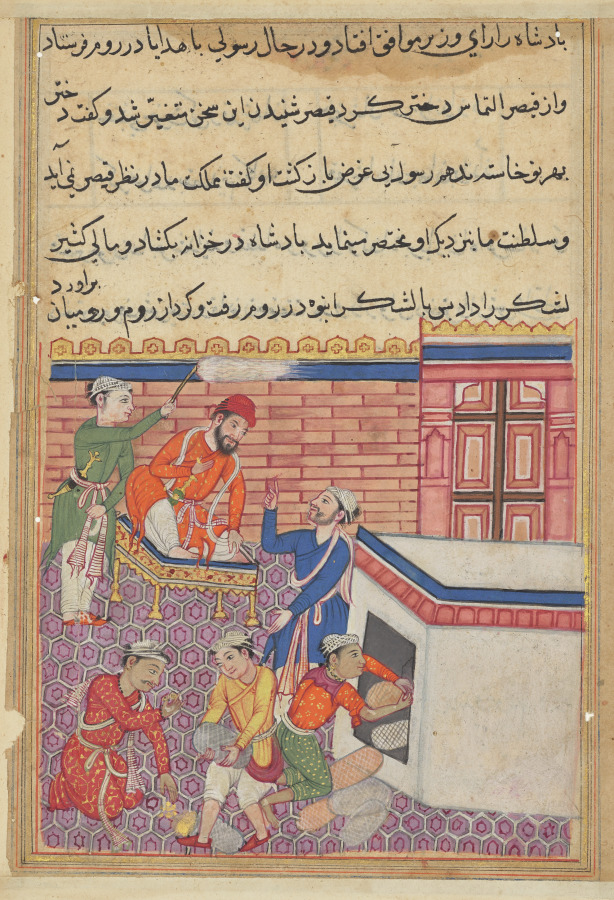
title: The king’s emissary being provided with gifts for his mission to Rum in order to seek the hand of the emperor’s daughter in marriage, from a Tuti-nama (Tales of a Parrot): Fiftieth Night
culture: Mughal India, court of Akbar (reigned 1556–1605)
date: c. 1560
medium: gum tempera, ink, and gold on paper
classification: Painting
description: In the background, the enthroned king addresses his emissary while members of his court collect wrapped bundles of goods. The king has conquered all surrounding lands and become indifferent as a result. His vizier suggests marriage to the princess of Rum, secretly hoping that the plan will spur the neglectful king to action.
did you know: The king’s attendant holds a flywhisk, called a chauri.